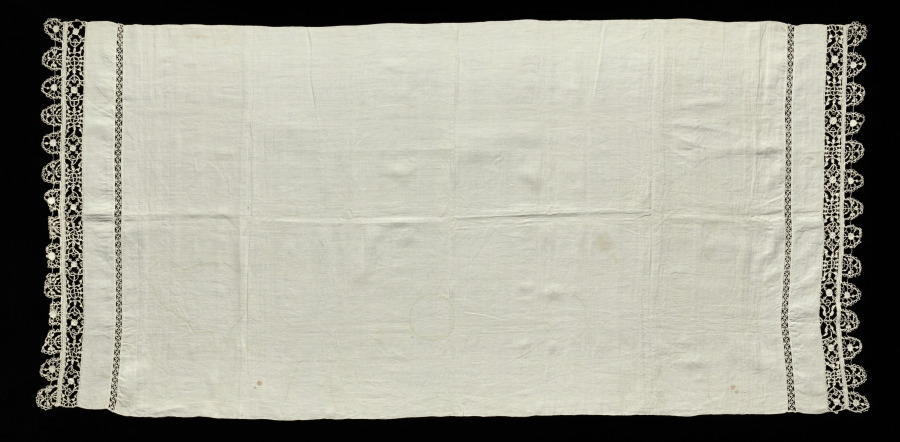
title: Lace Cloth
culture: Italy, Genoa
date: 1500s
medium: Linen: needle lace (reticella) and bobbin lace edging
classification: Lace